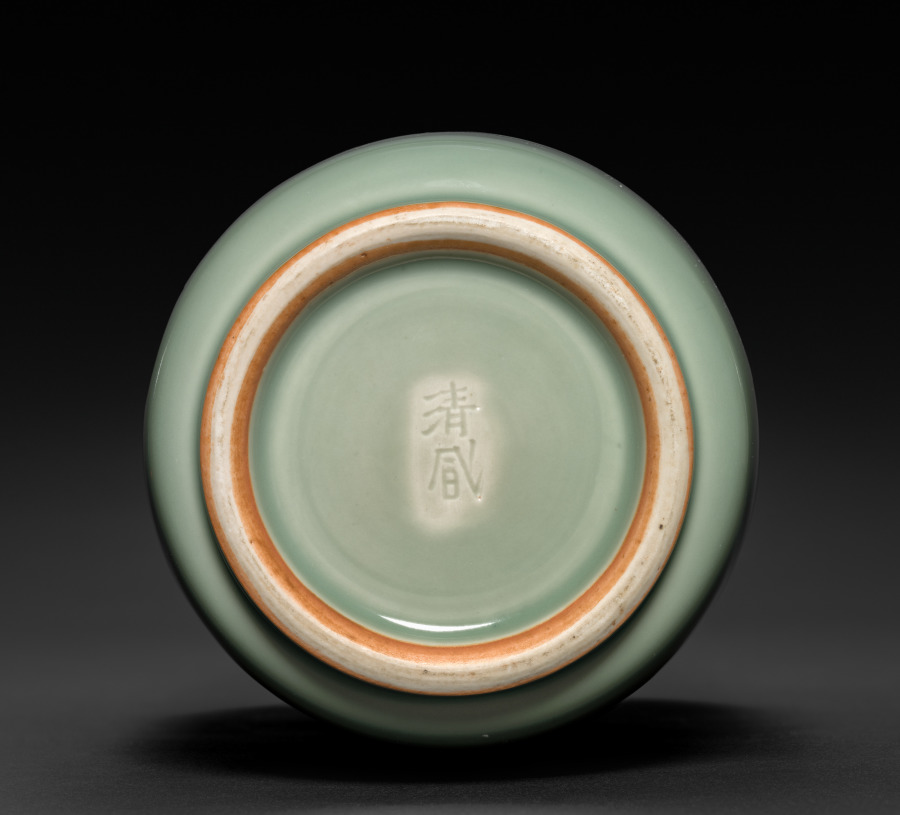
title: Tong-shaped Vase with Band of Cloud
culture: Japan, Meiji period (1868–1912)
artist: Seifū Yohei III (Japanese, 1851–1914)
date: 1893–1914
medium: Porcelain with molded and carved design and green glaze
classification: Ceramic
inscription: 清風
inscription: 帝室技芸員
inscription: 金聲玉振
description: Many of the vases created by Yohei III and IV were made with reference to and in emulation of Chinese ceramics in both form and glazing. The vessel type called tongping, pronounced tōbin in Japanese, is tall and cylindrical, like the thick length of bamboo referenced in the shape of the ideograph tong 筒. Unlike the ancient gu, hu, and guan, this form did not emerge in China until the Ming dynasty, and many such vases date to the early Qing dynasty. Two green-glazed vases, this one by Yohei III and the other by Yohei IV CMA 2022.228, are interpretations of this form. Yohei III’s version has slightly hunched shoulders and is somewhat wider at the top below the small neck and lip. Yohei IV’s vase is more angular. The wide rack of molded cloud encircling the Yohei III vase rises subtly from very low relief banding above and below it, accentuating the vessel’s rounded edges and complementing the form. In contrast, the allover flower vine pattern on the body and “seven treasures” pattern at the collar of the vase by Yohei IV evokes a garment’s cuffed sleeve, like the common English appellation for this type of vessel—“sleeve vase.”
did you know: Seifū Yohei III mined the repertoire of Chinese vessel types, from ceramics modeled after ancient ritual bronzes to shapes developed in the Yuan (1279–1368) and Ming (1368–1644) dynasties.